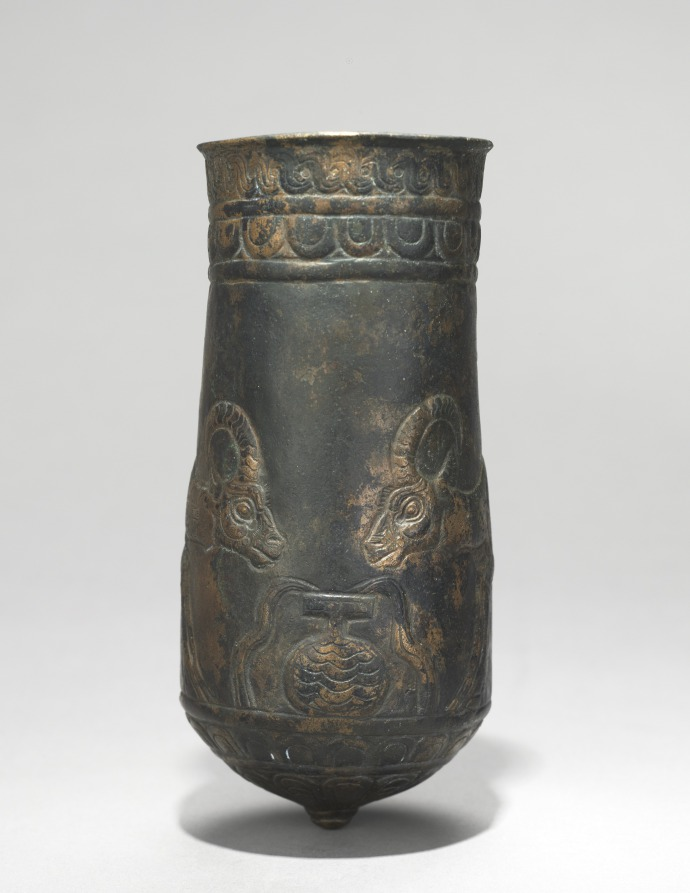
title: Button-Based Situla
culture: Iran, Luristan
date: 900–700 BCE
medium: bronze, repoussé, punched, incised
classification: Metalwork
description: The metalworkers of Luristan provided the Assyrian empire with elaborate bronze ornaments and vessels. These two situla are decorated symmetrically---one with ibexes drinking from an overflowing water jar; the other, with sphinxes.